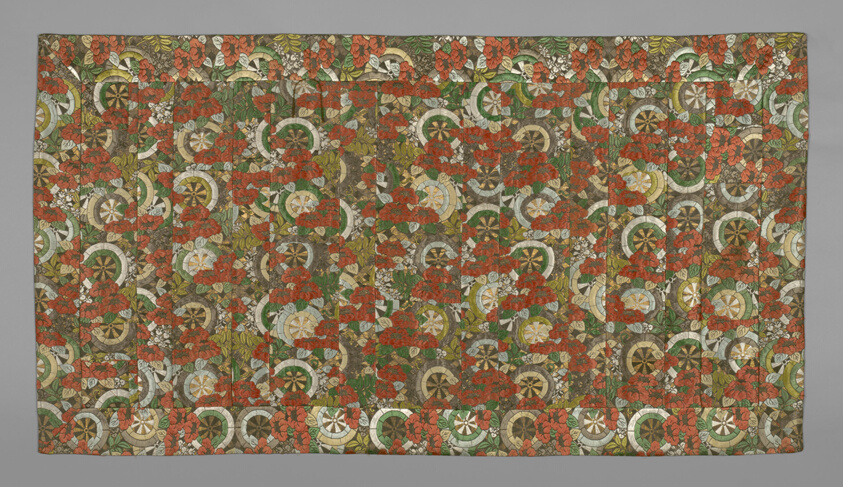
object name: Textile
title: Kesa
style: edo (japanese period)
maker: Japan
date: late Edo period (1789–1868), early 19th century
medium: Silk, gold-leaf-over-lacquered-paper strip, warp-float faced 2:1 'Z' twill weave with supplementary brocading wefts some bound in weft-float faced 1:2 'Z' twill interlacings; lined with silk, plain weave; silk cords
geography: Japan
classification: textile; costume; weaving; liturgical - buddhist